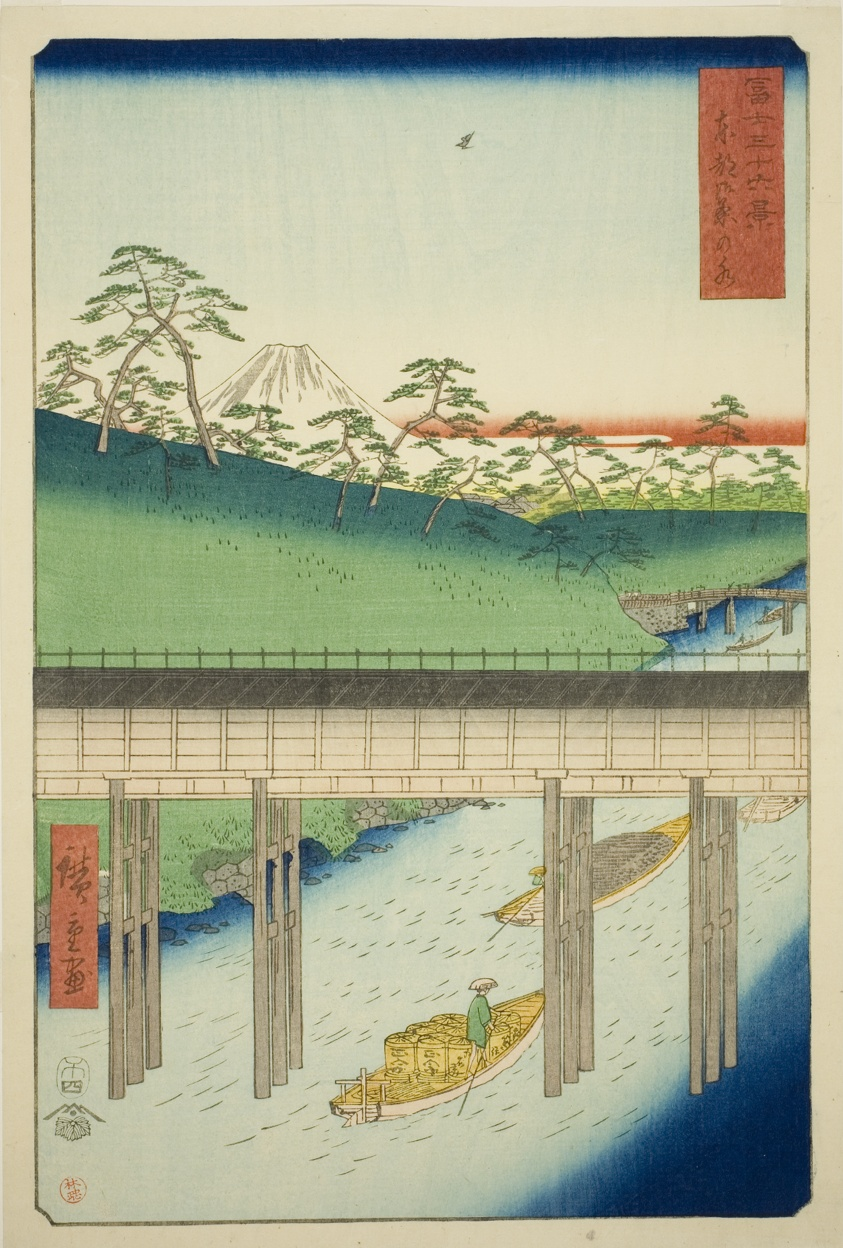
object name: Print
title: Ochanomizu in the Eastern Capital (Toto Ochanomizu), from the series "Thirty-six Views of Mount Fuji (Fuji sanjurokkei)"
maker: Utagawa Hiroshige 歌川 広重; Japanese, 1797-1858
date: 1858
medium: Color woodblock print; oban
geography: Japan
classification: woodblock print; print; asian art